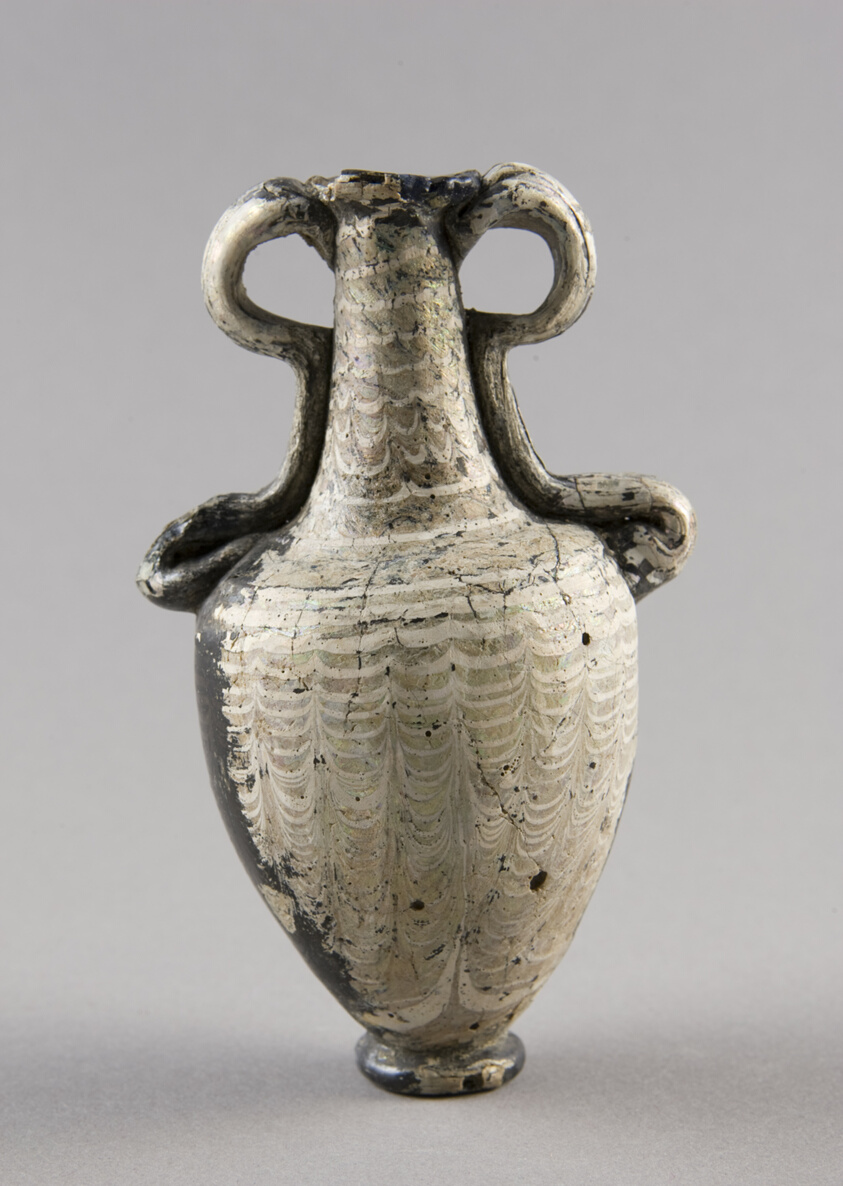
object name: Vessel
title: Amphoriskos (Container for Oil)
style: ancient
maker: Eastern Mediterranean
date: Hellenistic, 2nd-1st century BCE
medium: Glass, core-formed technique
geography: Eastern Mediterranean Region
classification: glass; vessel; ancient art